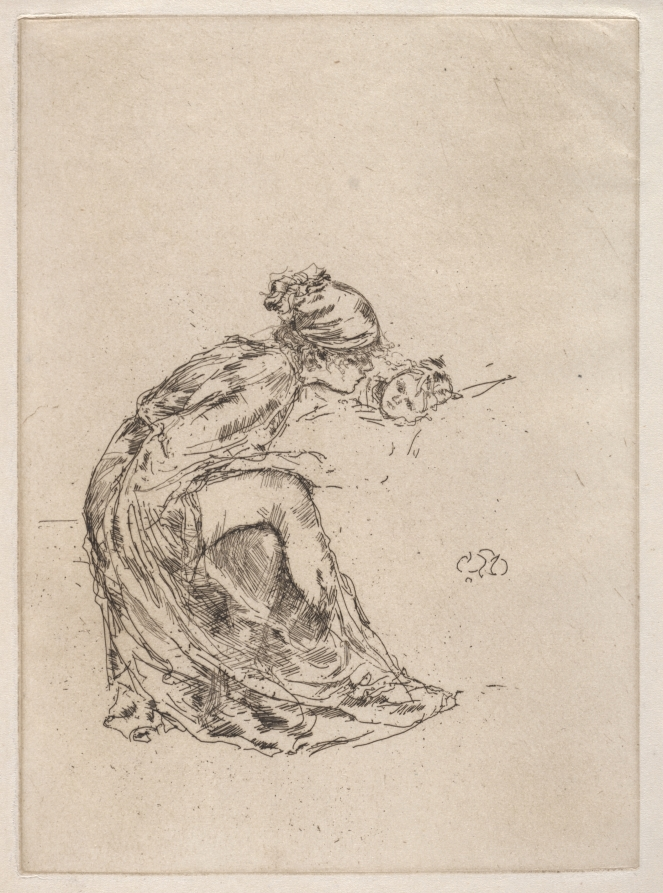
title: Cameo, No. 1 (Mother and Child)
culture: America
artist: James McNeill Whistler (American, 1834–1903)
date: c. 1890–93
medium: etching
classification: Print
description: Among a group of etchings Whistler made from a nude or partly draped model around 1890 was a pair entitled Cameo No. 1 and Cameo No. 2, showing a young mother playing with her child. Here, the mother leans over the child in an enclosed, protective gesture, perhaps whispering a lullaby. Whistler's treatment of the figure's robe, a semi-classical design based on Roman dress, captured the translucent qualities of the drapery which partly reveals and partly conceals the form beneath. Of this group, the artist's favorite etching was Cameo No. 1, and in 1893 he chose it to be exhibited among a selection of his prints at the Chicago World's Fair. American collectors, however, found Cameo No. 1 too risqué, and the artist was told it was unsalable because of "the thinness of the drapery."